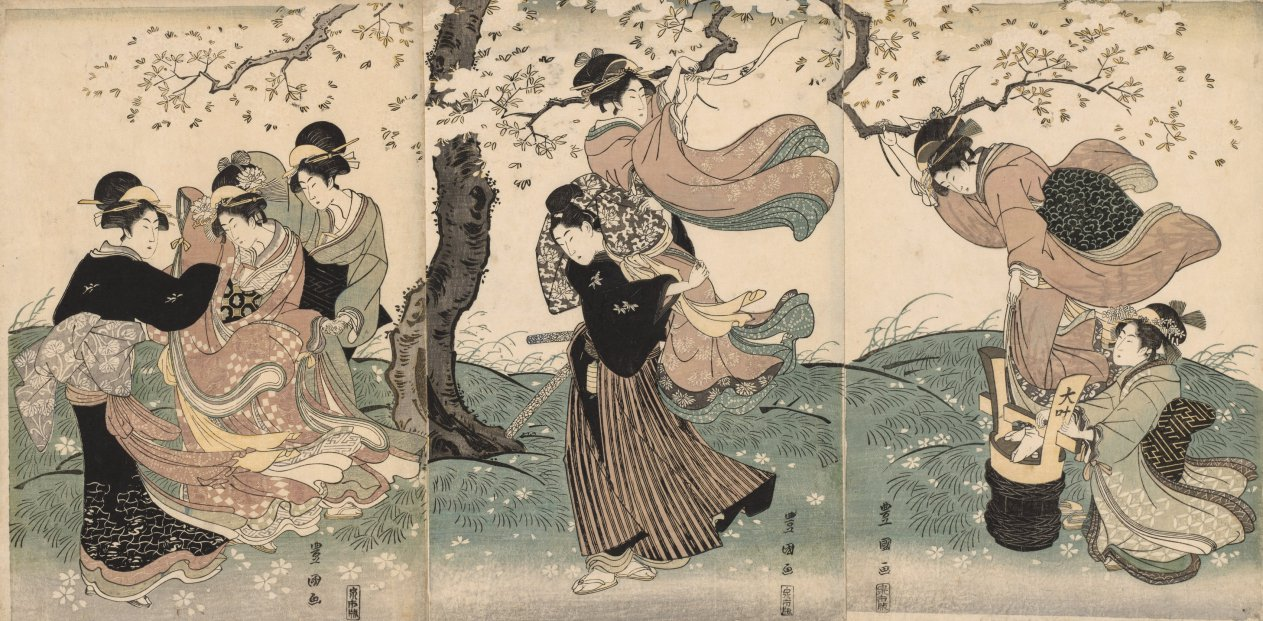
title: Cherry Blossoms in the Wind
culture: Japan, Edo period (1615–1868)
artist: Utagawa Toyokuni (Japanese, 1769–1825)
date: late 1790s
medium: Triptych of woodblock prints, ink and color on paper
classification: Print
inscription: Signature: Toyokuni ga Publisher: Izumiya Ichibei (Senichi han)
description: Highly regarded for his images of actors, Toyokuni was also known for his prints of beauties that demonstrate his brilliant skill in composition. This triptych depicts a joyful hanami (flower viewing) scene in spring. One woman stands on a huge wine bottle, while another one sits on a samurai’s shoulder; in both scenes, the women are tying prayers or poems on tree branches. On the left, two servants protect a well-dressed lady from the wind. Their fluttering, long-sleeved kimonos capture the wind’s movement. Standing in a triad, the three groups form a stable, harmonic composition against the cherry blossom background.